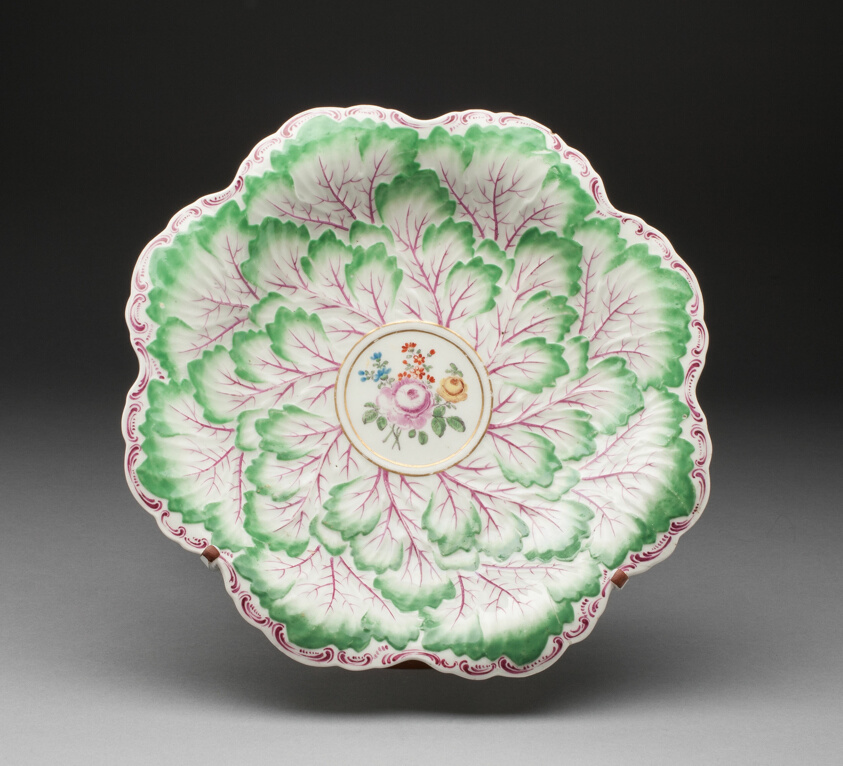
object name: Ceramics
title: Dish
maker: Worcester Porcelain Factory (Warmstry House Period, 1751–1783); Worcester, England, founded 1751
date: c. 1765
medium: Soft-paste porcelain, polychrome enamels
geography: Worcester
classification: dish (vessel); porcelain; european decorative arts; ceramics